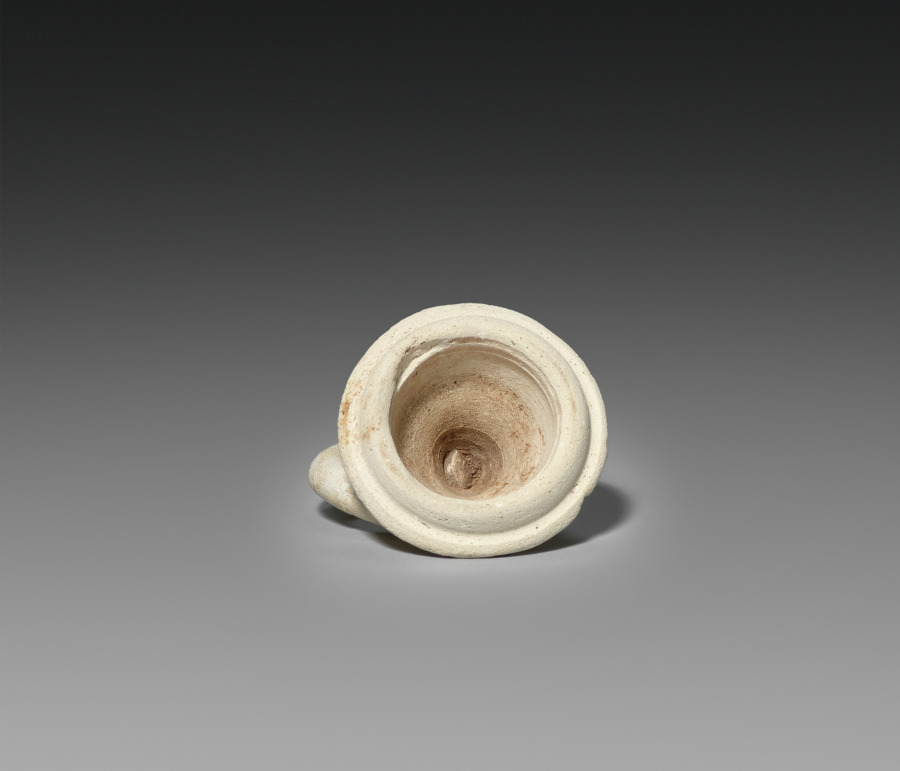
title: Jar in the Shape of a Fruit (Lid)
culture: Cambodia, Northeast Thai kiln, Khmer Ware, Angkor Wat/Bayon period, 12th century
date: 1100s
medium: glazed pottery with brown slip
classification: Ceramic